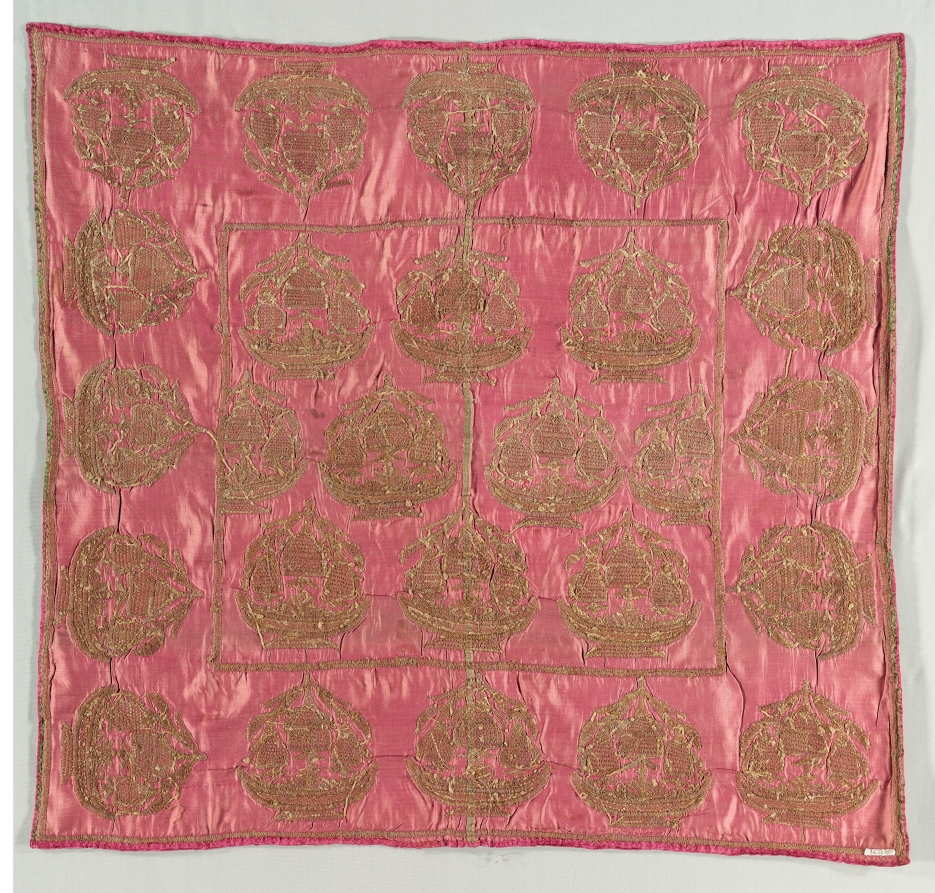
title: Embroidered Square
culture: Turkey, 18th-19th century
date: 18th-19th century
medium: embroidery: gold filé laid over cotton thread, couched at edges by cotton, on silk ground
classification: Embroidery